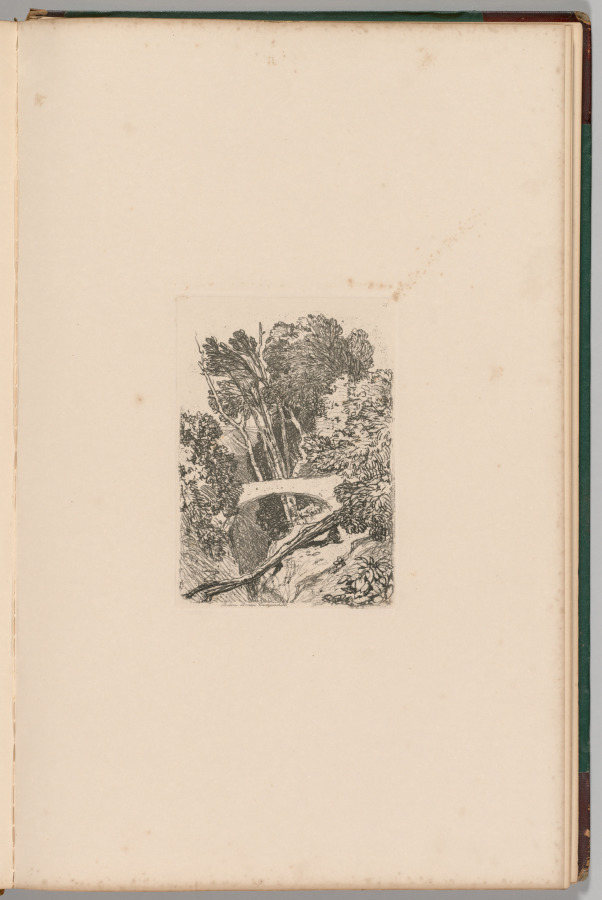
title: Liber Studiorum: Plate 11: Parson's Bridge, Cardingshire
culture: England, 19th century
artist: John Sell Cotman (British, 1782–1842)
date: 1838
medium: softground etching, from a bound volume containing 48 plates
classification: Bound Volume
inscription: In plate, within image, upper right: 11; in plate, below image: Parson's Bridge, Cardingshire